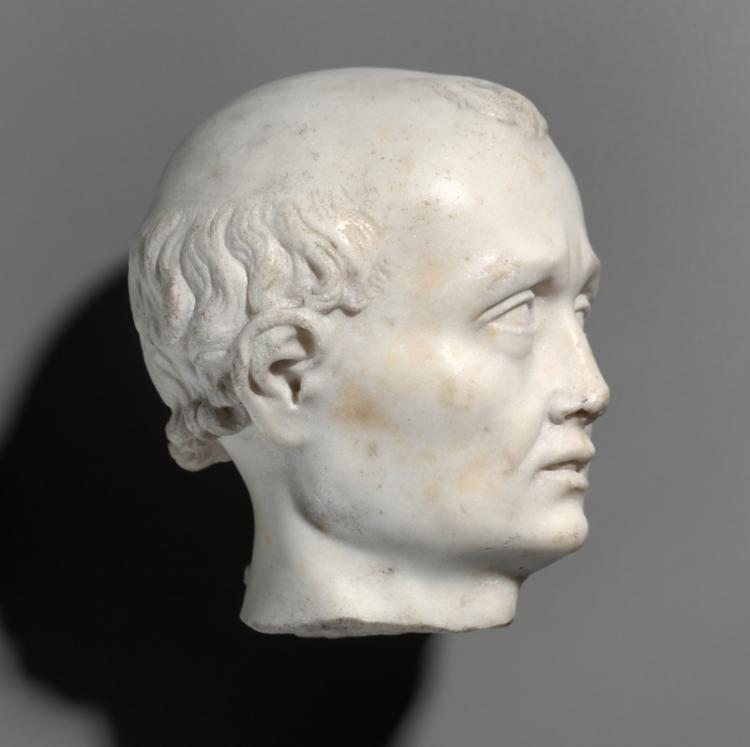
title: Head of a Woman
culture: France, 15th century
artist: circle of Michel Colombe (French, c. 1430–c. 1513)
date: c. 1500–1525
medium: marble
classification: Sculpture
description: The original context and function of these two marble heads are unknown. They are presumed to have been part of a relief sculpture from a château, perhaps in the Loire region, or else from a tomb sculpture. Their style is reminiscent of sculptures produced by Michel Colombe, a prominent sculptor active in the Loire Valley in the service of aristocratic and royal patrons, and may have been carved by a close follower or member of his workshop.